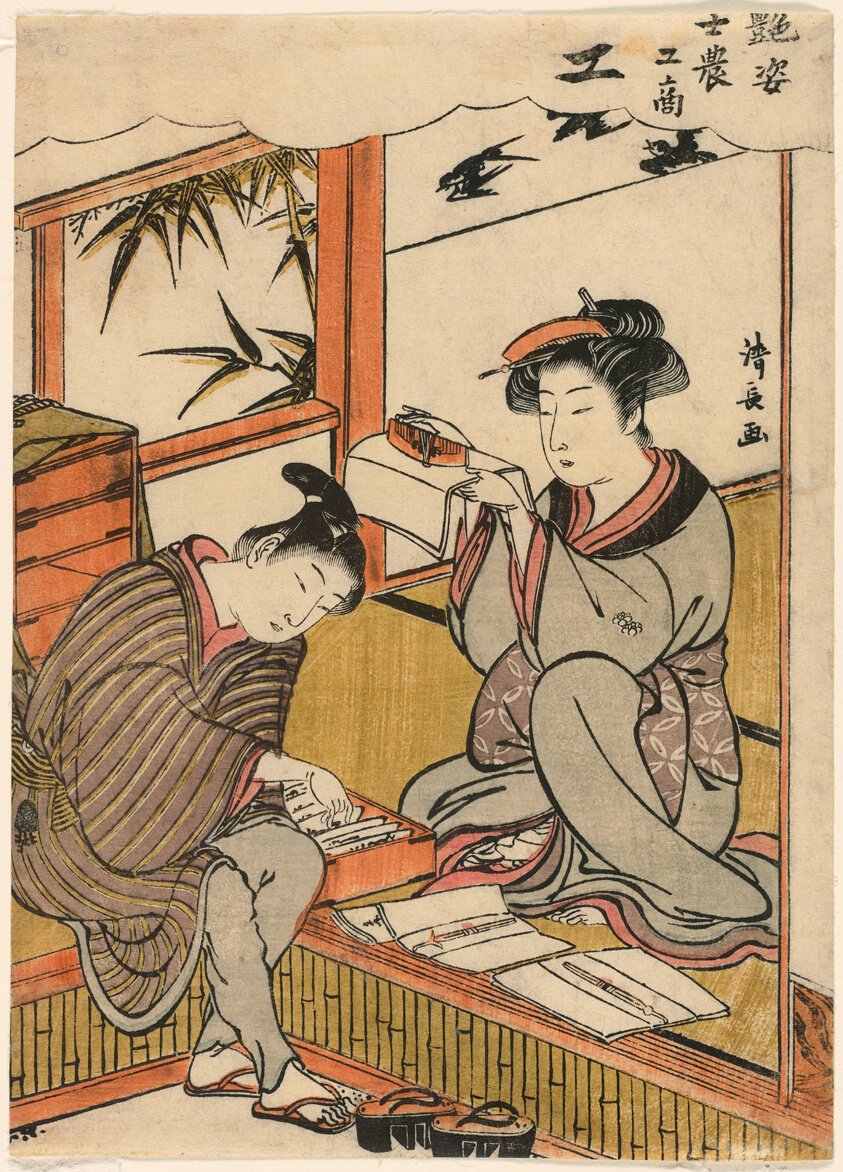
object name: Print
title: The Artisan (Ko) from the series "Beauties Illustrating the Four Social Classes (Adesugata shi no ko sho)"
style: Japanese (culture or style)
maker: Torii Kiyonaga (Japanese, 1752-1815)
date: c. 1779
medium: Color woodblock print; koban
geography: Japan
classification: woodblock print; print; asian art